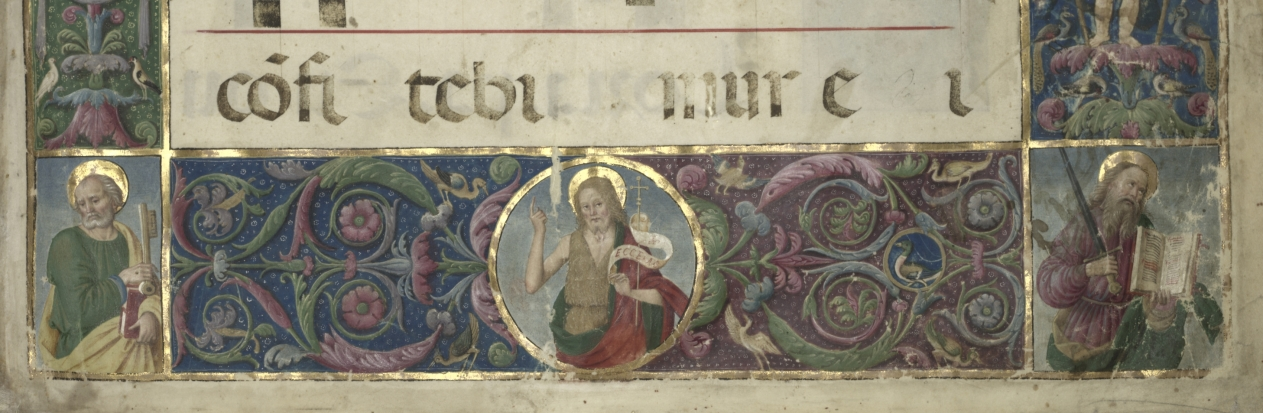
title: The Trinity: Leaf from a Gradual with Initial B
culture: Italy, Perugia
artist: circle of Perugino (Italian, c. 1450/55–1523)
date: c. 1496–1502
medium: ink, tempera, and gold on parchment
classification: Manuscript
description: The focus of this lavishly illuminated page is a large initial B containing a representation of the Holy Trinity (three persons in one godhead). The text, Benedicta sit sancta Trinitas, introduces the opening of the Introit for Mass on Trinity Sunday, celebrated one week after Pentecost. An illusion has been created by the artist who painted the framing initial to appear three-dimensional. Beyond the initial a landscape recedes as if viewed through an open window. The decoration extends into all four margins that are filled with small miniatures depicting saints (one was left blank). This page is a masterful example of Renaissance manuscript painting with classicizing leaf scrolls, masks, urns, putti, and other decorative motifs fashionable in Italy at the close of the 15th century. It may come from a set of choir books illuminated for Perugia Cathedral.